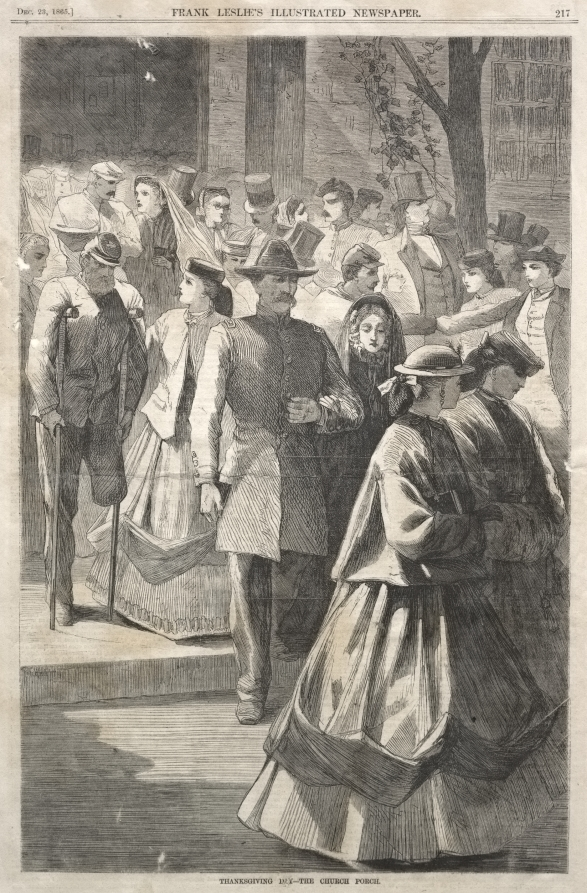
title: Thanksgiving Day - The Church Porch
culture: America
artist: Winslow Homer (American, 1836–1910)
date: 1865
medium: wood engraving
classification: Print